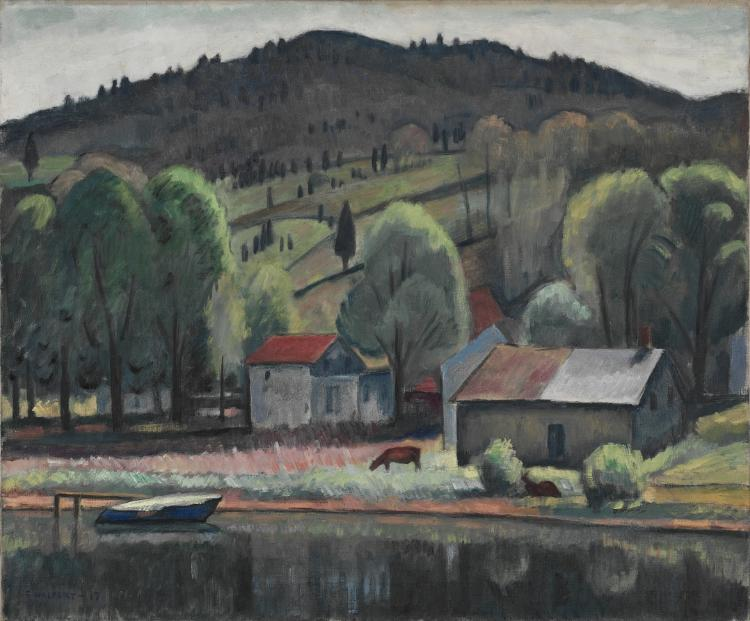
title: Eddyville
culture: America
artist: Samuel Halpert (American, born Russian Empire [now Poland], 1884–1930)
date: 1917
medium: oil on canvas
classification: Painting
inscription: signed lower left: S. HALPERT--17 [signed lower right: S HALPERT].